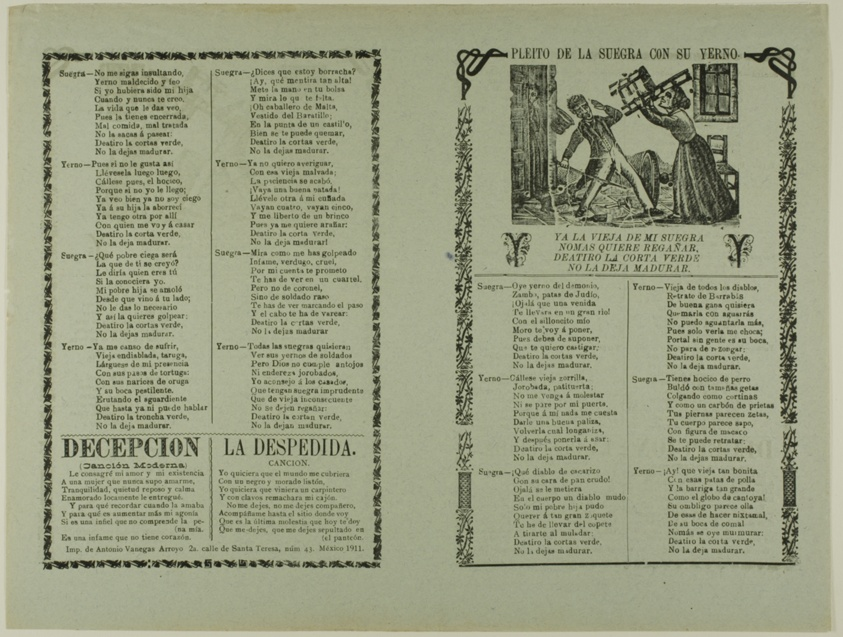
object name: Print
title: Pleito de la suegra con su yerno (Fight of the Mother-in-Law With Her Son-in-Law)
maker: Attributed to Manuel Manilla; Mexican, 1830-c. 1900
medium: Relief print on paper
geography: Mexico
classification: relief etching; print; prints and drawing